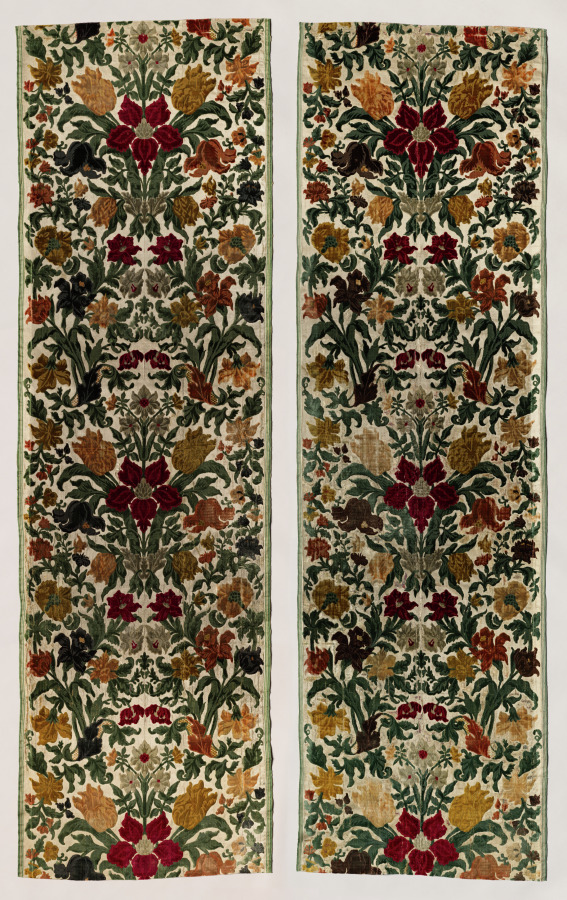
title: Lengths of Floral Velvet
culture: Italy, Genoa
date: 1600s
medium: velvet (cut, uncut, voided); silk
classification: Velvet